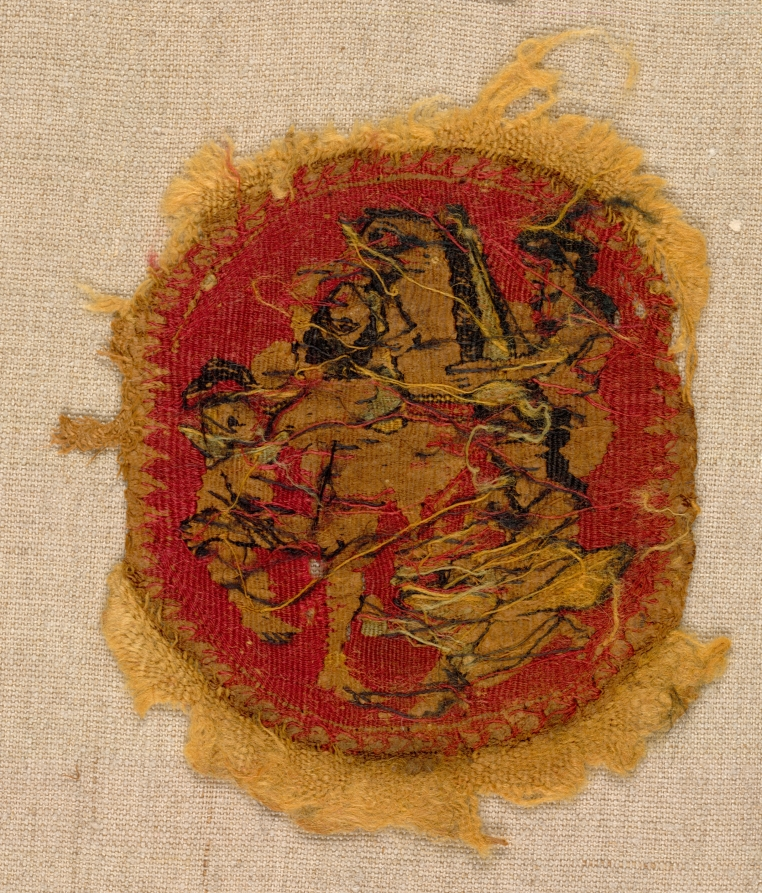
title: Five Round Segmenta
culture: Egypt, Umayyad period (661–750)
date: 650 – 750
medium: tapestry weave: wool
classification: Textile